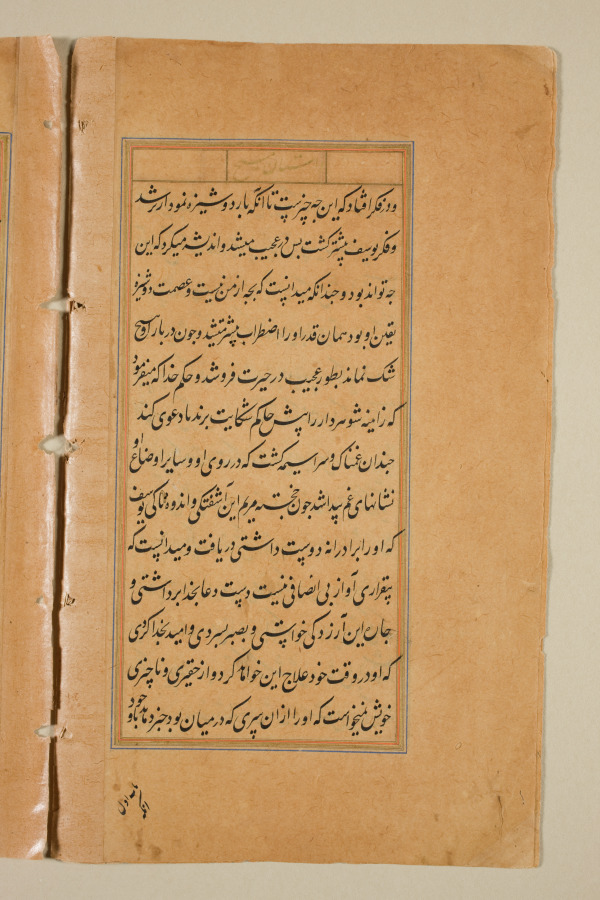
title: Text page from a Mirror of Holiness (Mir’at al-quds) of Father Jerome Xavier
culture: Mughal India, Allahabad, made for Prince Salim (1569–1627)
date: 1602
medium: Ink and gold on paper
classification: Manuscript